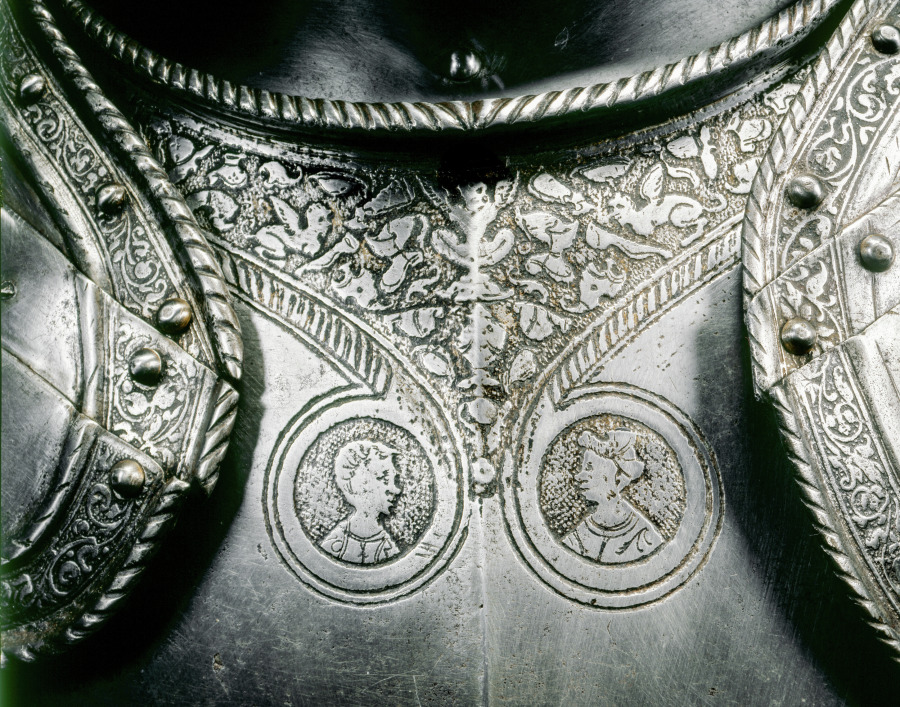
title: Half-Suit of Armor for the Field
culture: North Italy, Brescia (?), 16th century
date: c. 1575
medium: steel with etched decorative bands and roundels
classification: Arms and Armor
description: Decoration was critical to fine armor, and etching was the most commonly used technique. Here, the bands along the borders are etched. On the breastplate, pauldrons (shoulder guards), and tassets (hip and upper leg guards), etched medallions enclose profile busts reminiscent of ancient Roman portraits. The lance rest on the breastplate indicates that this half-suit was once part of a complete field armor for man and horse. The etching technique used for armor was developed in the late 1400s. The metal surface was first coated with an acid-resistant substance, such as wax or varnish. An etching needle was then used to scratch a design into the surface. The exposed areas were then treated with an acid that would "bite" or etch the lines into the metal. When the coating was removed, the etched design was blackened for contrast.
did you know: This is an example of raised field etching where the design stands out in slight relief from the background.